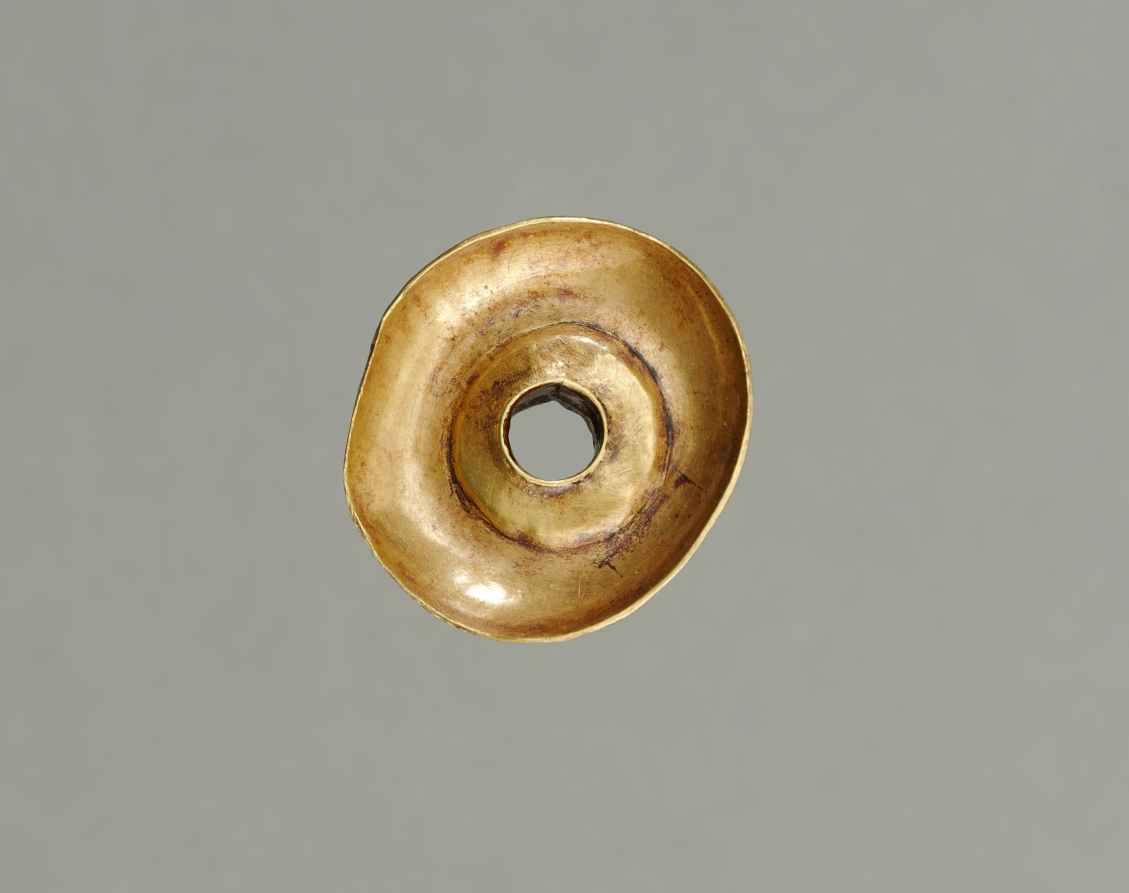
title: Ear Ornament(?)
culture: Peru, North Highlands, Chavín de Huantar(?), Chavín style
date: 500–200 BCE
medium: hammered and cut gold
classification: Metalwork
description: There seems to be a link between Chavín religion and appearance of the Andes’ first large precious-metal objects, made using revolutionary new metallurgical processes. Chavín may have developed these technical innovations to express the inexpressible, the "wholly other" nature of its religion. In many areas, elite men and women wore the ornaments as emblems of their ties to this religion, and eventually were buried with them. These 16 objects, along with three others not in the museum’s collection, are said to have come as a group from Chavín itself.